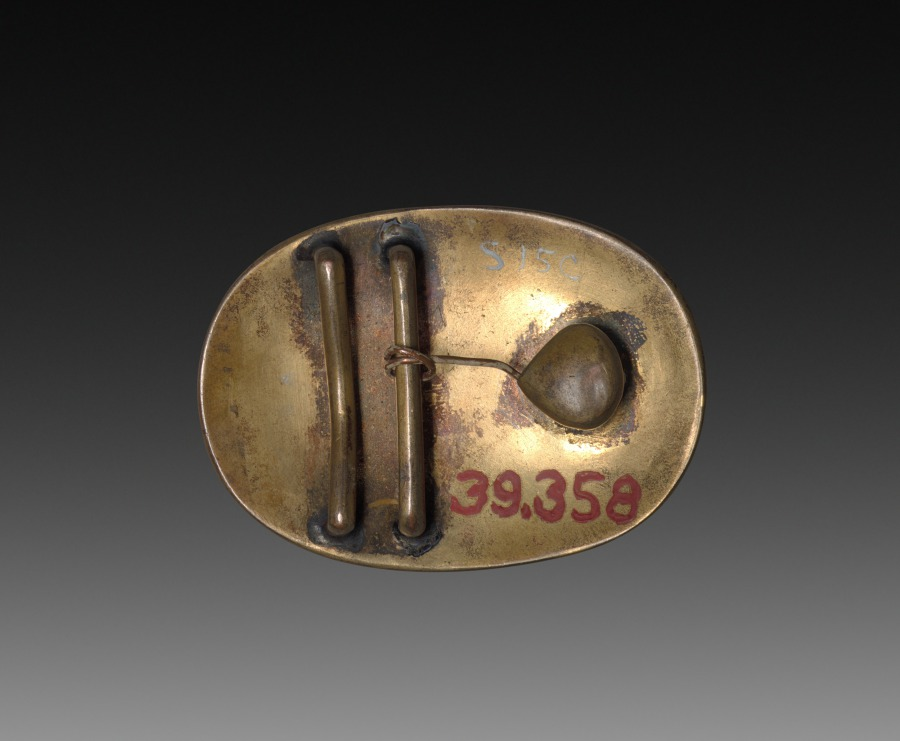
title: Belt Buckle with Cricket on Radish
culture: Japan, Meiji period (1868–1912) to Taishō period (1912–26)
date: early 1900s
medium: cloisonne enamel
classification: Enamel